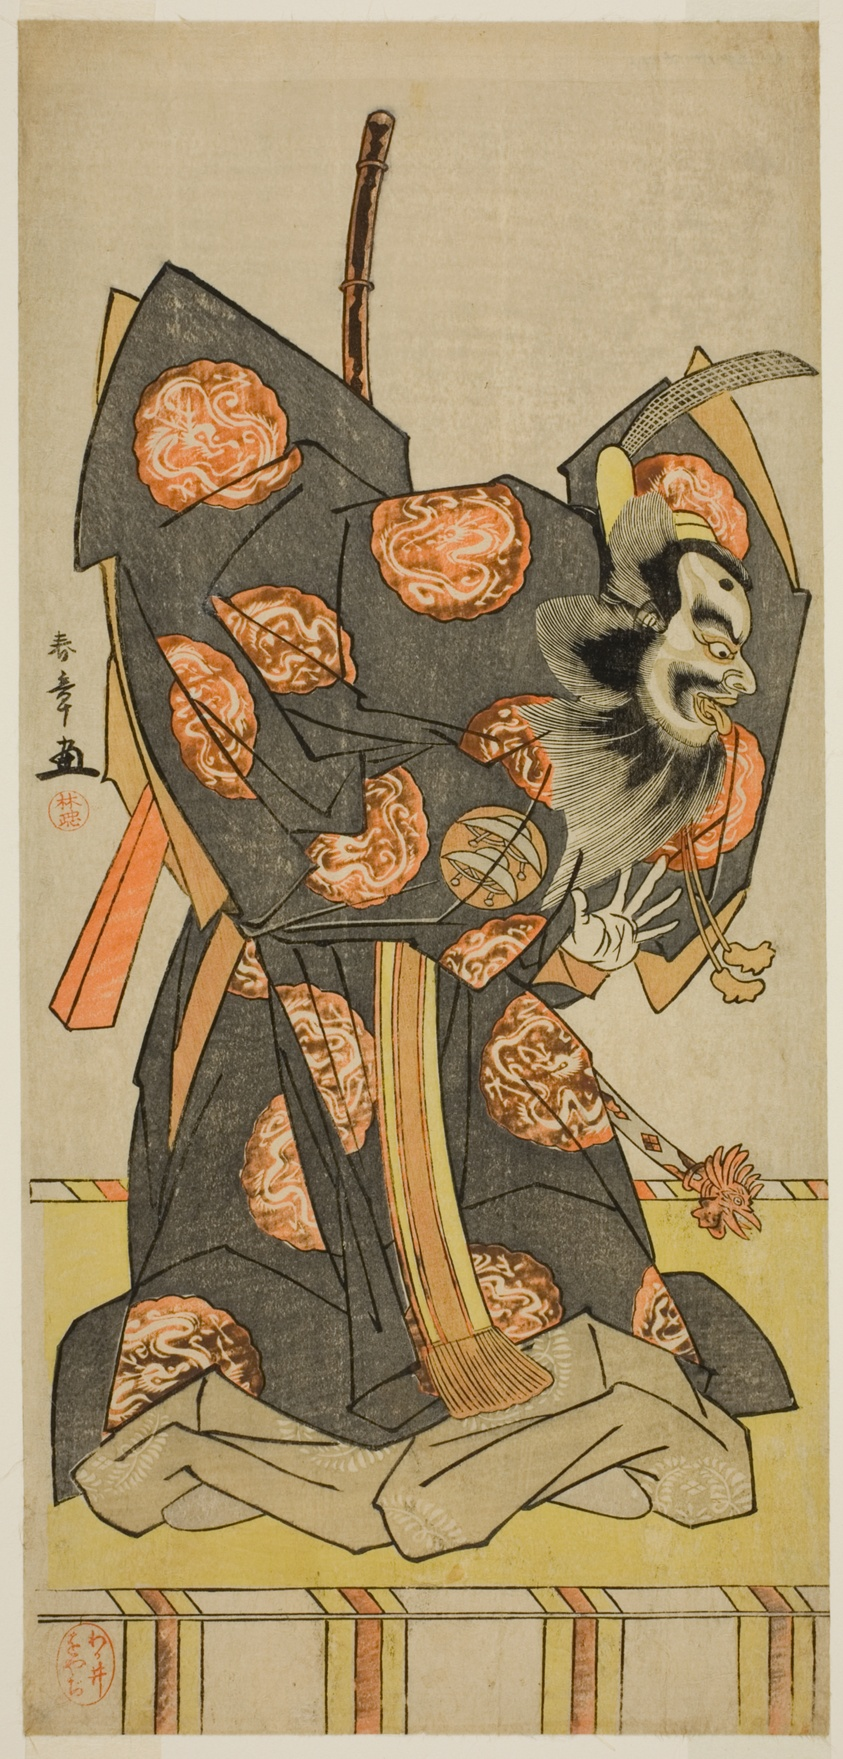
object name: Print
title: The Actor Nakajima Mihoemon II as Shujaku Tenno in the Play Masakado Kammuri no Hatsuyuki, Performed at the Nakamura Theater in the Eleventh Month, 1777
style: Japanese (culture or style)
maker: Katsukawa Shunsho 勝川 春章; Japanese, 1726-1792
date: c. 1777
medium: Color woodblock print; hosoban; from a multisheet composition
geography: Japan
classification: woodblock print; print; asian art